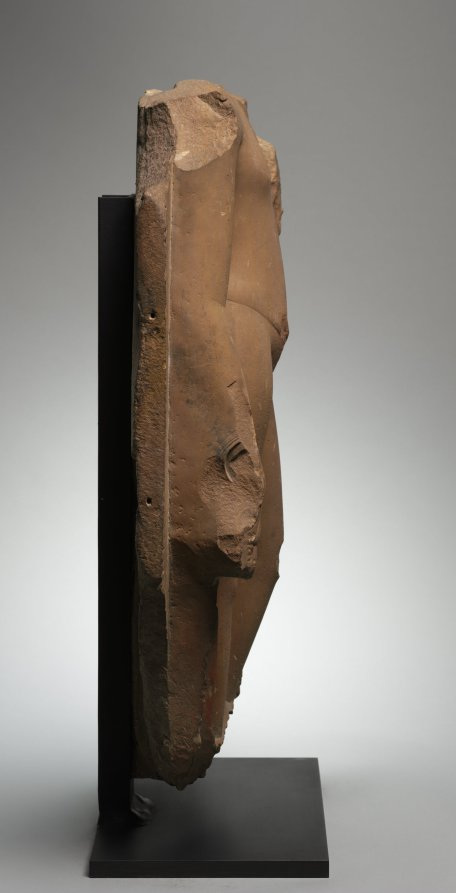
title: Standing Buddha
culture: Northern India, Uttar Pradesh, Sarnath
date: 400s CE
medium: sandstone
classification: Sculpture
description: Depicting the Buddha in a plain robe that clings to the body, without interrupting the beauty of its contours, was a new development in the sculptural workshops of Sarnath during the 400s CE. Sarnath is located near the ancient city of Varanasi on the banks of the Ganges River and is identified as the place where the Buddha gave his first teaching. This form spread by means of portable images to peninsular Southeast Asia.